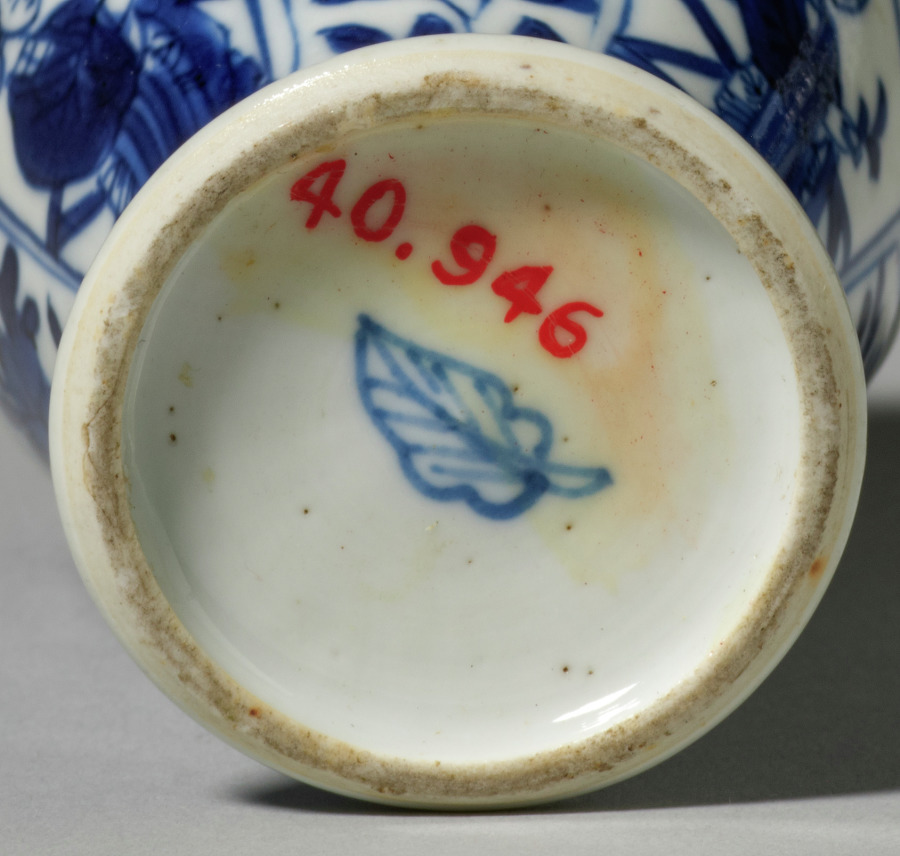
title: Jar with Cover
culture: China, Qing dynasty (1644-1911)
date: 19th Century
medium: porcelain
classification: Ceramic